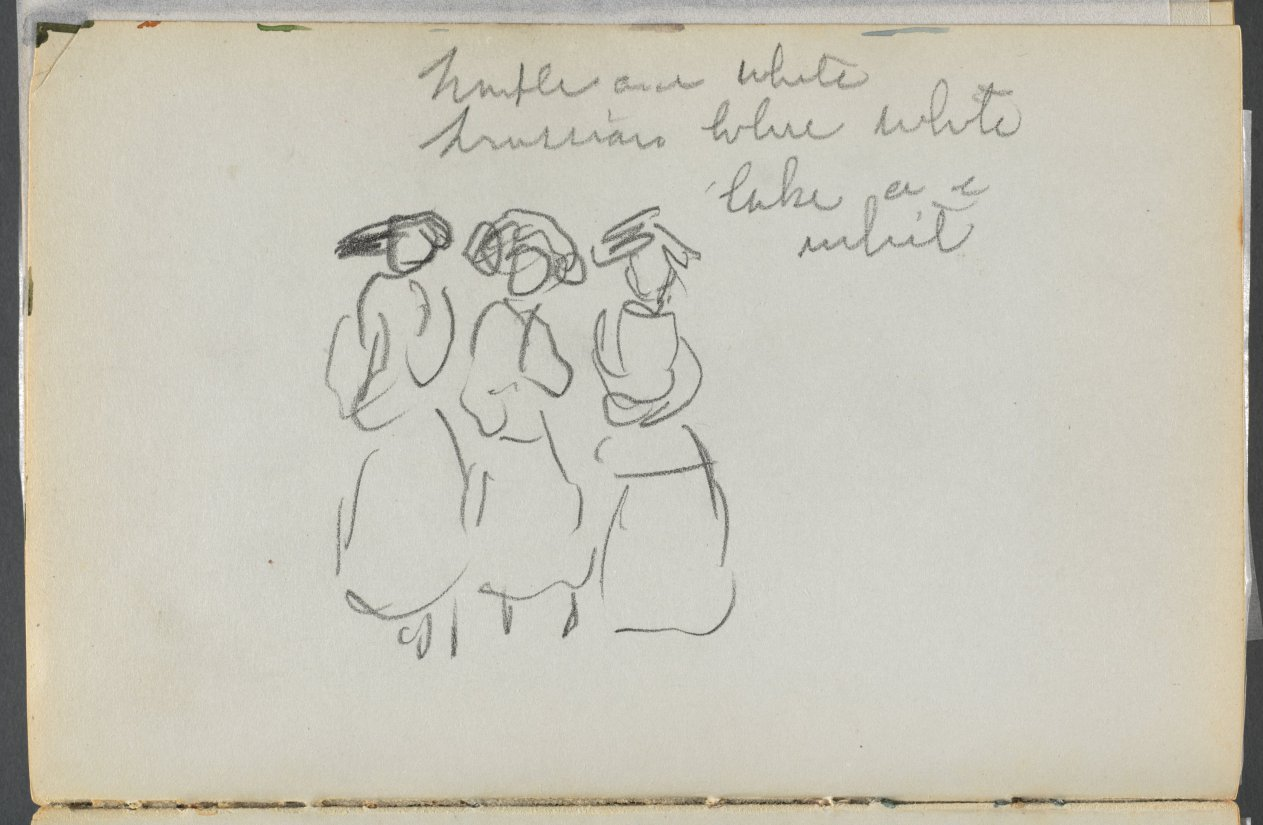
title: Sketchbook, The Dells, N° 127, page 140: Three Figues with Color Notations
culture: America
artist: Maurice Prendergast (American, born Newfoundland [now Canada], 1858–1924)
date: c. 1919–1921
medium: graphite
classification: Bound Volume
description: This sketchbook contains 59 pages of graphite drawings and 16 watercolors made at various locations on Cape Ann, Massachusetts.